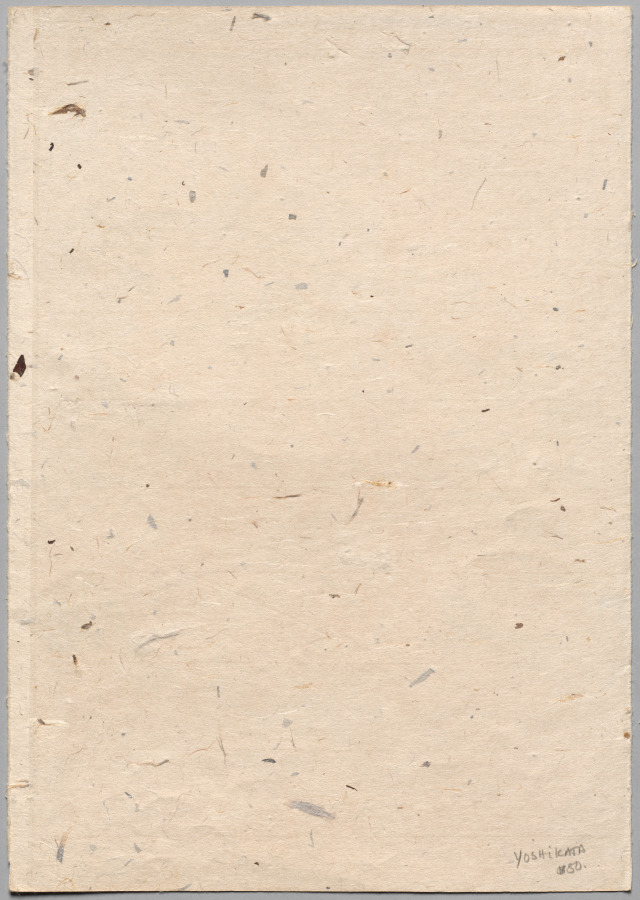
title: On the Road, A Lady of the Genkō Era (1313-34), from the series Thirty-Six Elegant Selections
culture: Japan, Meiji period (1868–1912)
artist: Mizuno Toshikata (Japanese, 1866–1908)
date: 1894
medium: Woodblock print, ink and color on paper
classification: Print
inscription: Inscription Type: series title Inscription Transliteration: 三十六佳撰 Inscription Romanization: Sanjūrokkasen Inscription translation: The Thirty-six Elegant Selections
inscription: Inscription Type: print title Inscription Transliteration: 旅路元頃婦人 Inscription Romanization: Tabiji Genkō koro fujin Inscription translation: On the Road, A Lady of the Genkō Era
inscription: Inscription Type: artist’s signature Inscription Transliteration: 年方 Inscription Romanization: Toshikata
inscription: Inscription Type: artist’s seal Inscription Transliteration: 應斎年方 Inscription Romanization: Ōsai Toshikata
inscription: Inscription Type: engraver’s seal Inscription Transliteration: えん活刀 Inscription Romanization: En-Katsu to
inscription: Inscription type: date and publisher’s information Inscription Translation: Meiji 27 (1894) Akiyama Buemon (summary)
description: Each of the prints in the series Thirty-six Elegant Selections features a woman from a different time period, as befits an artist who was interested in history painting. Most of the prints are set in the Edo period (1615–1868). Mizuno Toshikata was a favored student of Tsukioka Yoshitoshi (1839–1892), and took over his post as a newspaper illustrator.